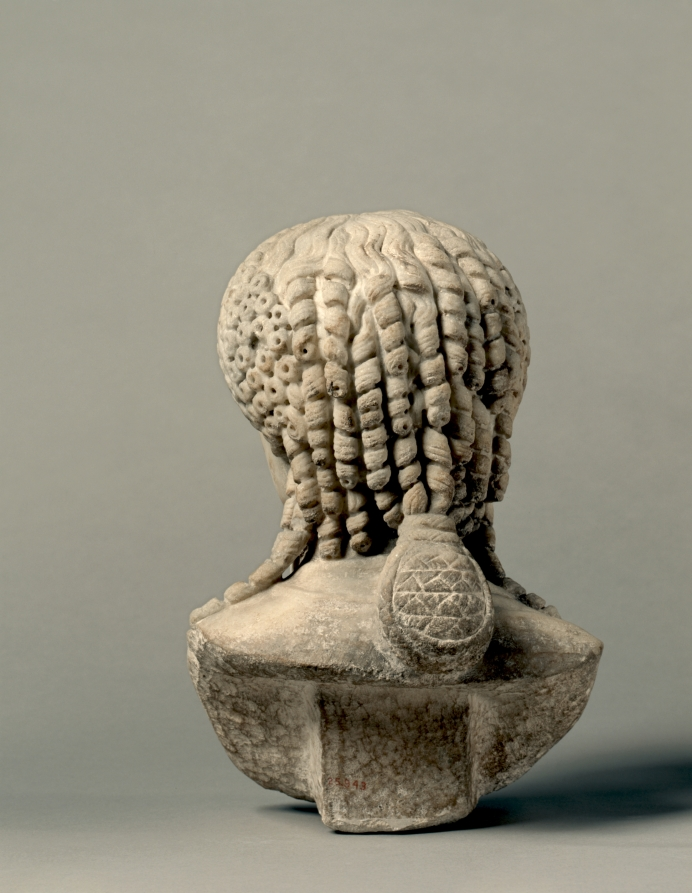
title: Portrait Bust of the Empress Claudia Octavia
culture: Italy, Roman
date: 50–70 CE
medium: marble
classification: Sculpture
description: This portrait bust depicts a young woman whose idealized features and elaborate hairstyle may identify her as the empress Claudia Octavia (r. AD 54-62), unfortunate first wife of the notorious emperor Nero. Over her tunic she wears a stola, a long garment hanging from both shoulders and distinguishing her as a married, upper-class woman. Although beloved by the Roman citizenry and described by the historian Tacitus as “aristocratic and virtuous,” Octavia was eventually divorced and banished by Nero, then ordered put to death.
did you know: The complex coiffure includes four elements: parted waves (top), tight curls (sides), hanging ringlets (shoulders, back), and a braided knot (back).